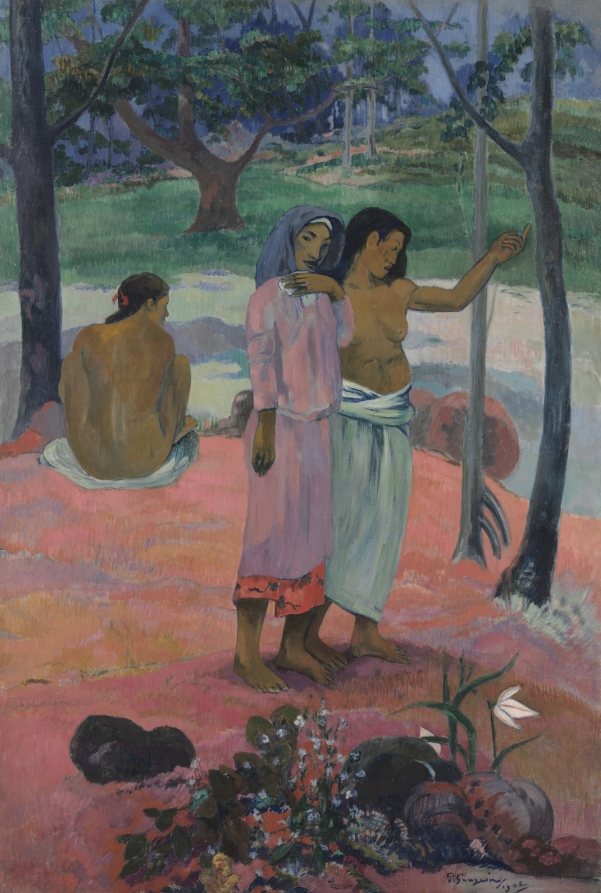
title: The Call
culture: France, late 19th-early 20th Century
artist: Paul Gauguin (French, 1848–1903)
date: 1902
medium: oil on fabric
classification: Painting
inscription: Signed lower right: P. Gauguin / 1902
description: Painted on a remote island in Polynesia a year before the artist's death, The Call belongs to a series of late works that explore the mysteries of life and death. Two women stand with bare feet, as if on sacred ground. One woman gestures to someone outside the picture, perhaps responding to a "call" from fate or destiny. Gauguin realized his ambition of painting from memory and the imagination through such mysterious, dreamlike images.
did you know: Although known as one of the founders of modern art, Gauguin found inspiration in ancient Greek, Roman, and Egyptian art. The woman with the pointing finger on the right side of this painting was taken from a figure on the Parthenon frieze.